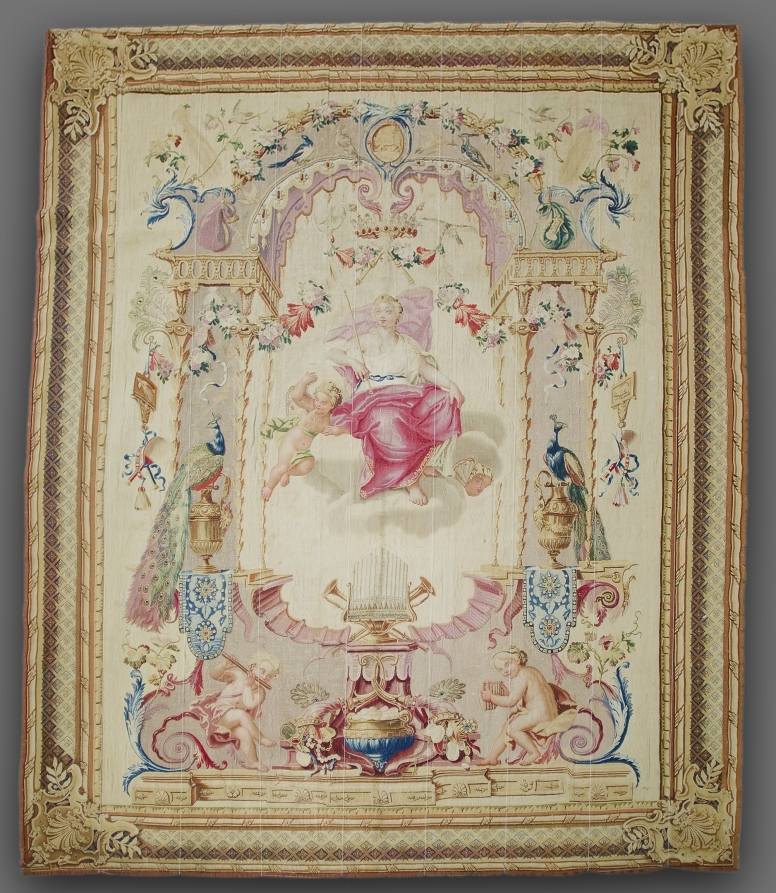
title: Elements: Air, Juno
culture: France, 18th century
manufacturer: Gobelins Manufactory (France, Paris, est. 1662)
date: 1700s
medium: tapestry weave; silk, wool, cotton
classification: Tapestry